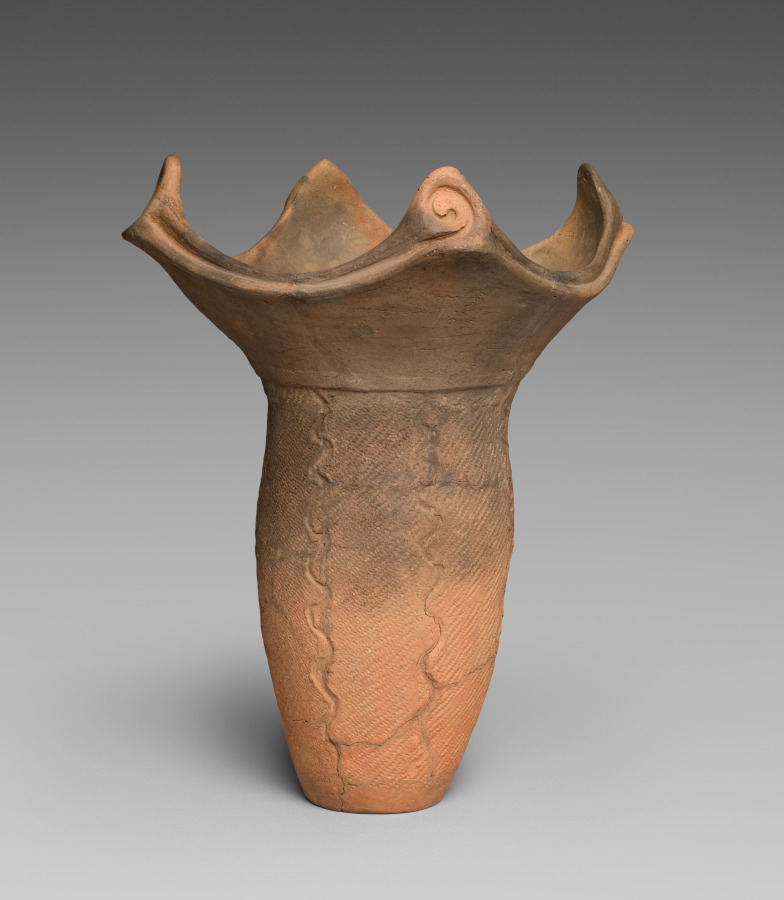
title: Deep Vessel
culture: Japan, Jōmon period (c. 10,500–300 BCE)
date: c. 2500 BCE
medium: Earthenware with impressed and carved decoration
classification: Ceramic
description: This cooking vessel was formed by piling coils of clay atop one another, smoothing and thinning the walls, and then adding surface decoration. Vertical incised squiggle lines as well as diagonal impressed cord patterns create texture. The mouth rises in four dramatic triangular forms, each with a coiled design inside.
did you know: Jōmon, impressed rope patterns, are typical of vessels of this era, so archaeologists named the period after them.